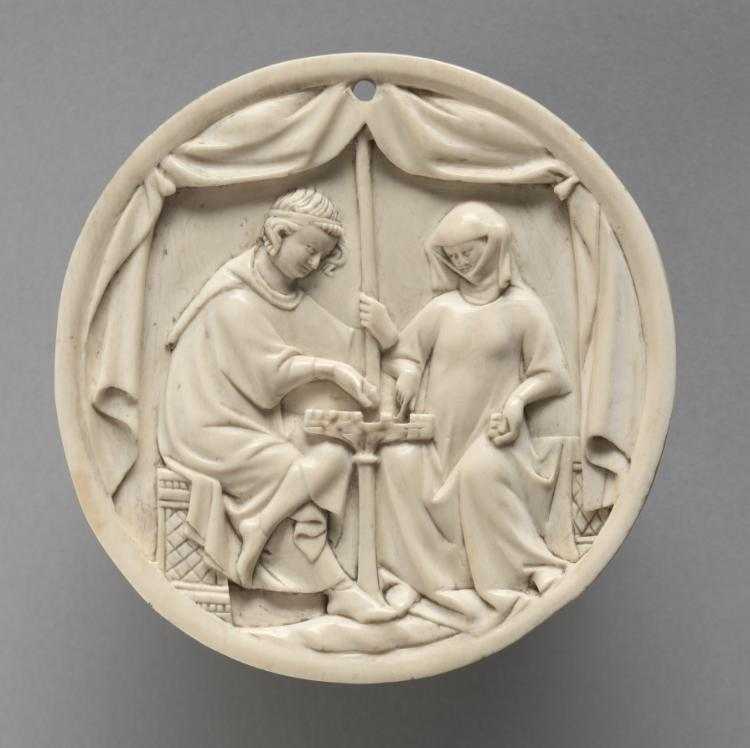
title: Mirror Case with a Couple Playing Chess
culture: France, Paris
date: 1325–50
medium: ivory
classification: Ivory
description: During the 1300s, elephant ivory was valued by courtly patrons as the most exquisite material for indicating the human form. At this time Paris was the center of production for luxury ivories like the example seen here. They were much sought after by members of the court and aristocracy as emblems of wealth and status and signifiers of fashion and taste. This ivory, once forming a mirror back, depicts a man and woman engaged in a game of chess, a popular game at the time representing both love and war in medieval iconography. Various suggestions have been proposed for the identity of the couple—Tristan and Iseult or Lancelot and Guinevere—without certainty. Mirror backs survive in large numbers from the 1300s and typically depict amorous encounters or chivalrous behavior. They were produced for a secular clientele steeped in romantic literature and with an appetite for luxury objects.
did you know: Chess was a wildly popular pastime among the nobility, and was also an important element in medieval romantic literature. Who do you think is winning this game?